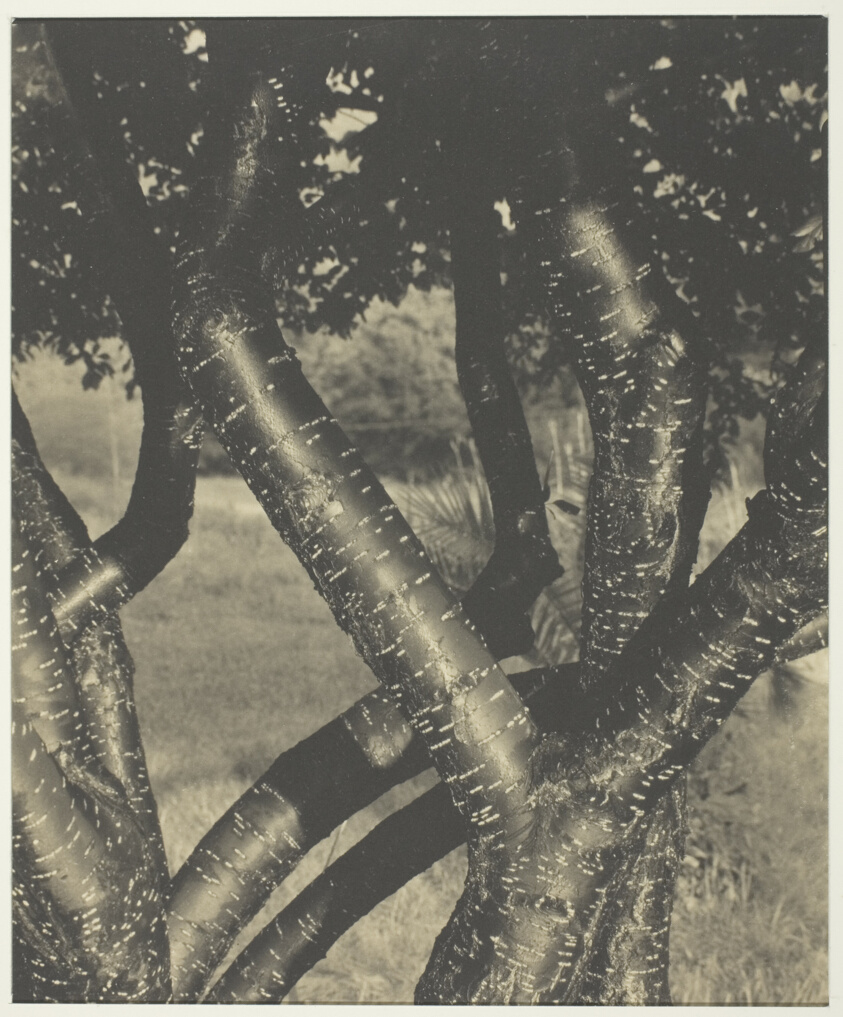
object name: Photograph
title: The Dancing Trees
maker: Alfred Stieglitz (American, 1864–1946)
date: 1922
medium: Palladium print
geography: United States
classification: palladium print; photographic process; photography; photograph